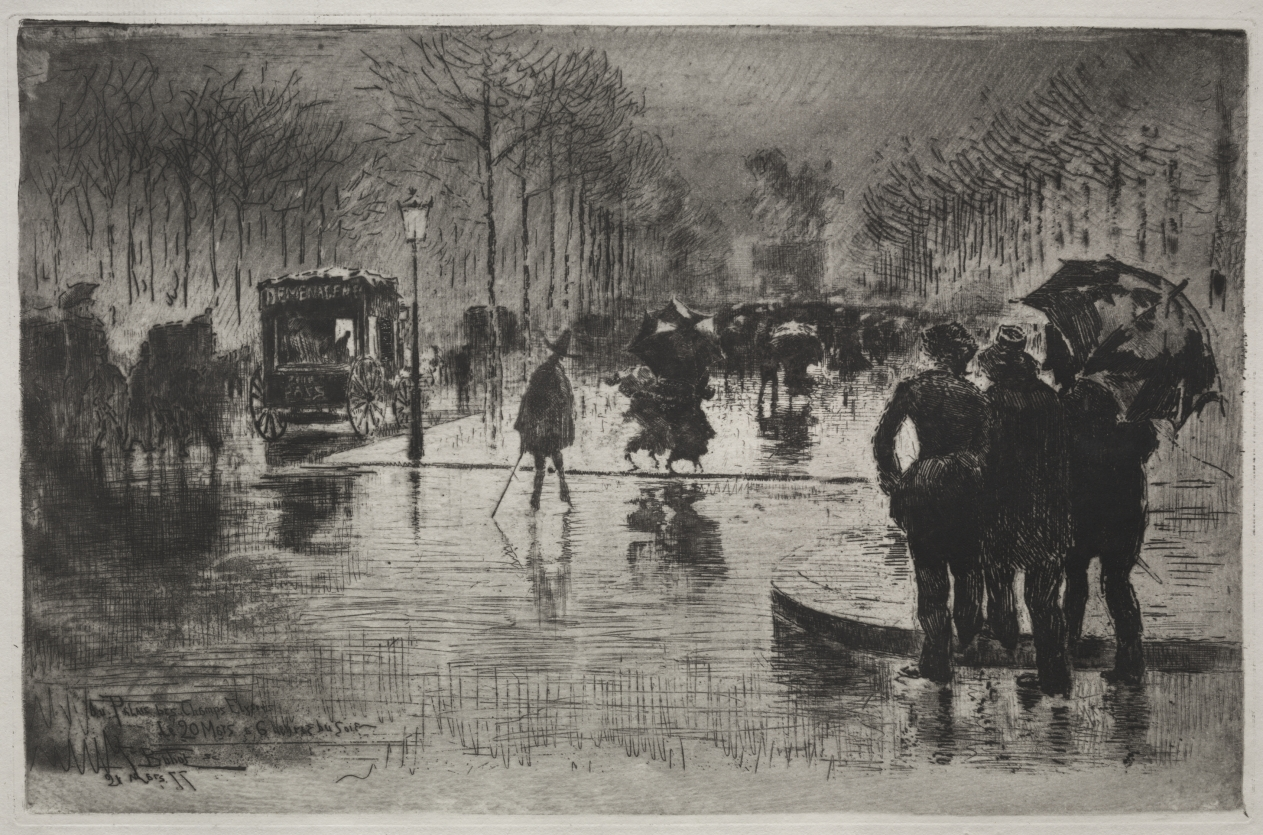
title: Artists Returning from the Salon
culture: France, 19th century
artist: Félix Hilaire Buhot (French, 1847–1898)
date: 1877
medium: etching, aquatint, and drypoint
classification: Print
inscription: inscribed, lower left, in plate: "Au Palais des Champs Elyseès/Le 20 Mars à 6 heures du soir/F. Buhot/ 21 Mars 77"